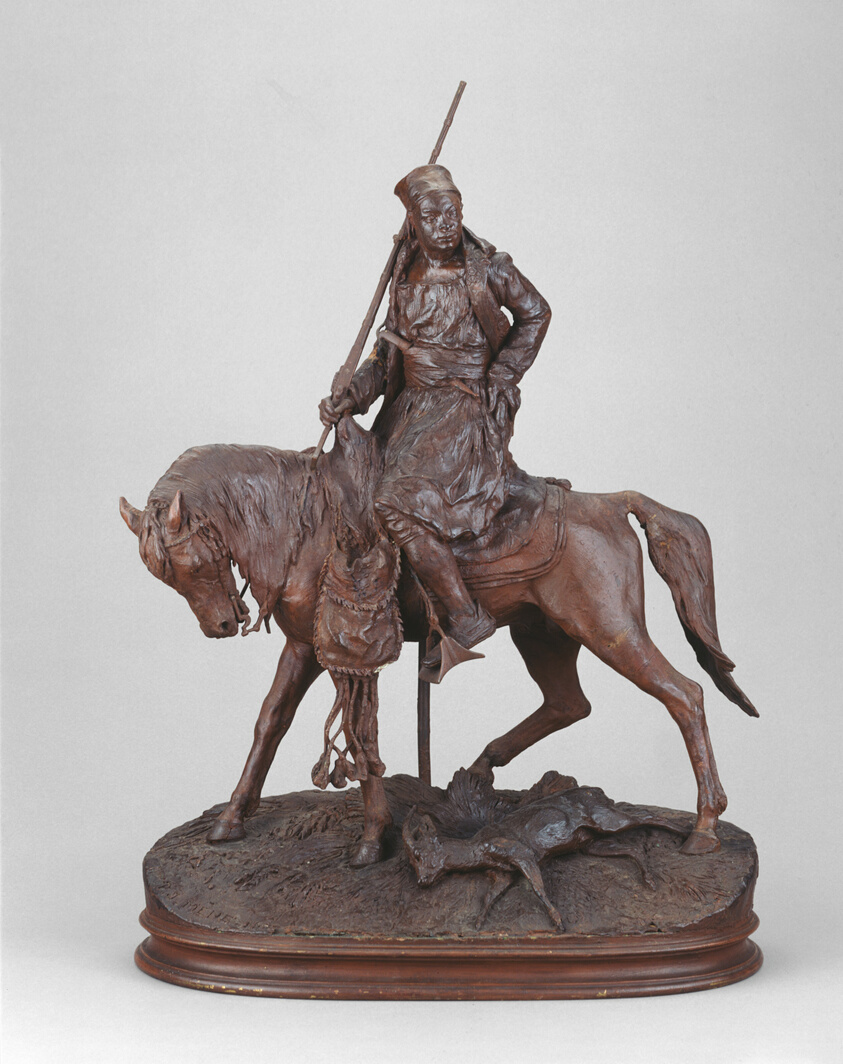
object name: Sculpture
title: African Hunter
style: nineteenth century, 19th century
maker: Pierre-Jules Mêne (French, 1810–1879)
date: 1877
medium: Wax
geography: France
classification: statuette; sculpture; figure; french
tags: hunter, animals, deer, figure, guns, horse, human, knife, man, weapons